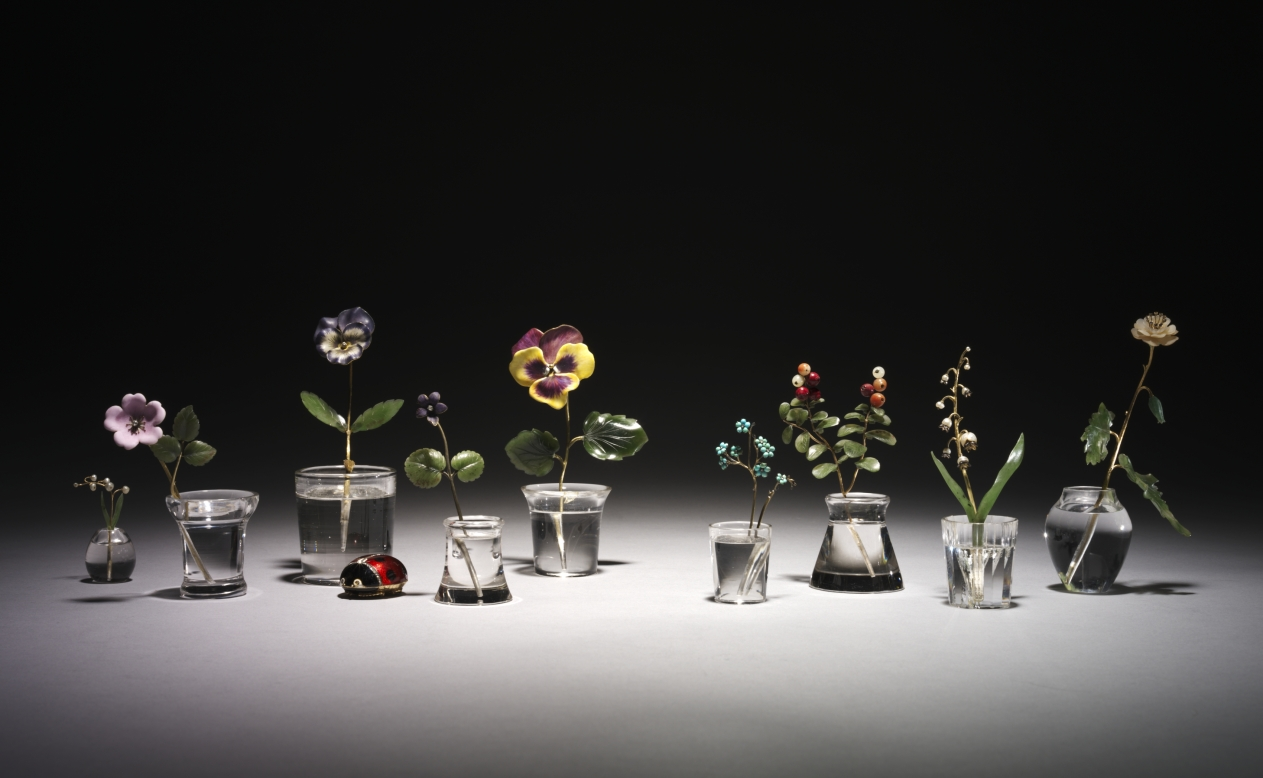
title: Flower Study of a Miniature Lily of the Valley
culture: Russia, St. Petersburg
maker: House of Fabergé (Russian, 1842–1918)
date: c. 1885–1915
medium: pearls, jade, rock crystal, gold, diamonds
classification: Miscellaneous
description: A small, carved rock crystal vase holds this lily of the valley study. The pearls, forming the flower’s buds, are drilled and attached to the remarkably slim gold stem. The hand-cut nephrite (jade) leaves enhance the naturalistic aura of the flower. Fabergé’s inspiration for his flower studies is said to have come from the floral brooches of precious stones that were made in the 1700s for Catherine the Great as well as from the Japanese art of flower arranging, known as ikebana.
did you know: Small and delicate, Fabergé’s flower studies were given as intimate gifts to friends by Tsarina Alexandra and others in the court. She kept them in all the palaces as a reminder of spring during the harsh Russian winters.